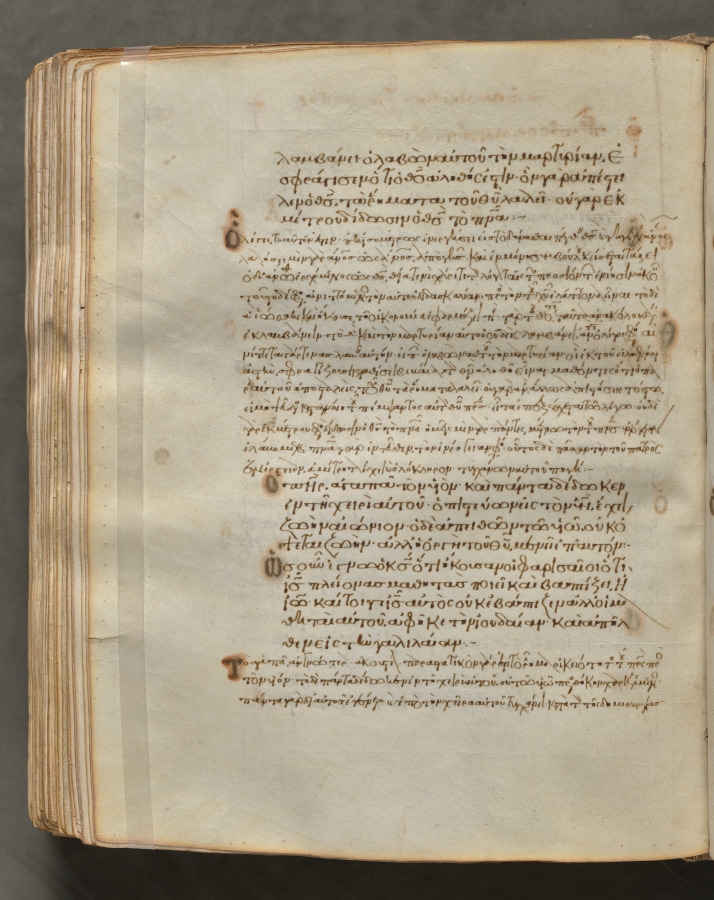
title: Text, folio 336 (verso), from a Gospel Book with Commentaries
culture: Byzantium, Constantinople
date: c. 1000–1100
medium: ink, tempera, and gold on vellum; leather binding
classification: Bound Volume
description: Each of the four gospels in this book opens on a page with brilliantly illuminated borders depicting the author of the text as well as birds—principally peacocks, symbols of the immortality of the soul—and fountains, representing the fountain of life and the salvation of the soul. This volume consists of 428 leaves with texts in Greek. Its level of sophistication suggests that it was probably written and decorated in a monastery in Constantinople.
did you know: Gospel books were carried in procession through Byzantine churches.